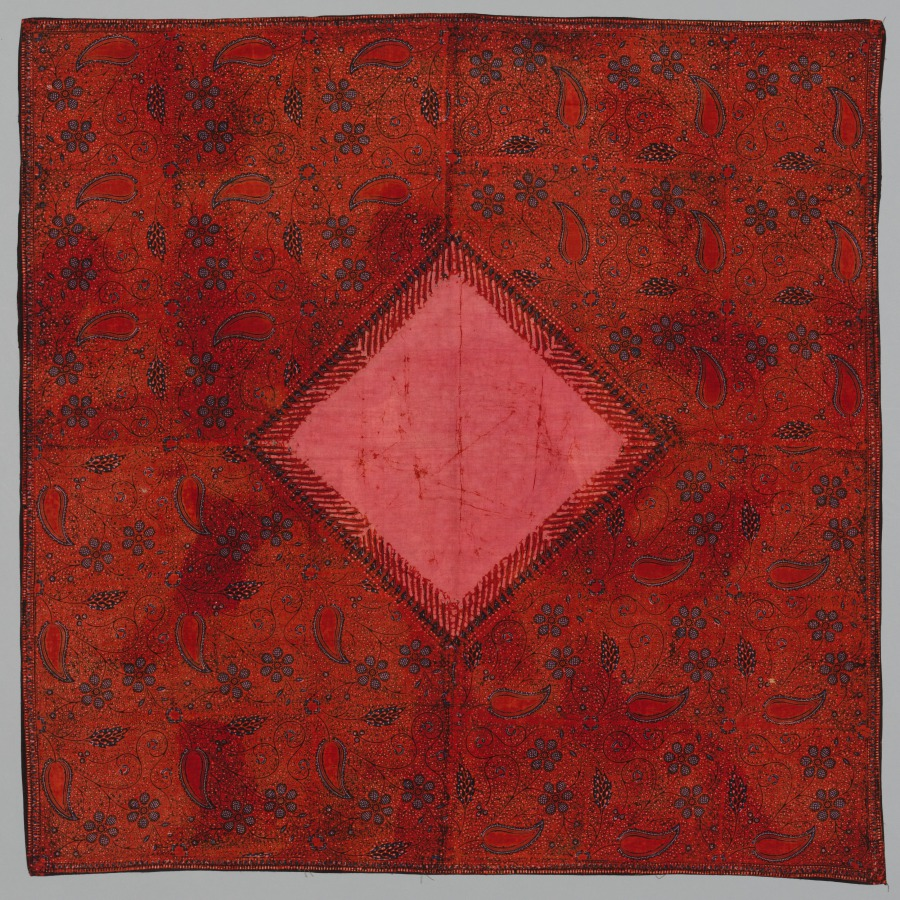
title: Head Cloth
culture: Indonesia, Java, North Coast, early 20th century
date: early 1900s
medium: batik; cotton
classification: Textile